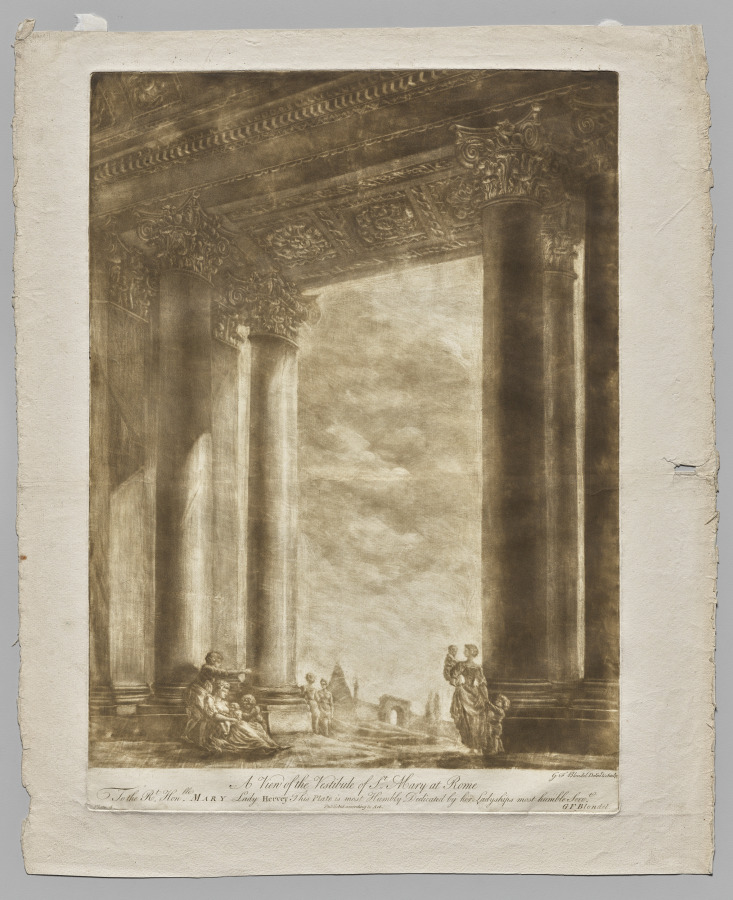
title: A View of the Vestibule of Saint Mary at Rome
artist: Georges Francois Blondel (French, 1730–1800)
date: 1766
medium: mezzotint printed in sepia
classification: Print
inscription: Imprinted on recto: “A View of the Vestibule of St. Mary at Rome”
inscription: Imprinted on recto: “G F Blondel Delin’t & Sculpt”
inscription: Imprinted on recto: “TO the Rt Hon’ble Mary Lady Hervy This Plate is most Humbly Dedicated by her Ladyships most humble Serv’t/Published according to Act/G F Blondel/Plate 4”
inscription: Watermark: Grand-Jésus stock of T. Dupuy, watermark Name of Jesus (IHS), countermark T Dupuy Fin Auvergne 1742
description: After returning from several years spent in Italy, the French printmaker George-Francois Blondel settled in London in order to take advantage of the English taste for images of Italian sites. This is one of a series of eight prints he published in 1766 depicting imagined and real Italian interiors. Using the relatively new technique of mezzotint, which creates velvety, dark tonal areas, as well as low vantage points, Blondel created towering, awe-inspiring spaces. For special patrons, he printed the plates in sepia ink, rather than in black; the CMA’s set includes two of these unusual sepia impressions.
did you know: Mezzotint was relatively new at the time this print was made and had yet to be utilized for such large plates of an architectural nature as seen here.